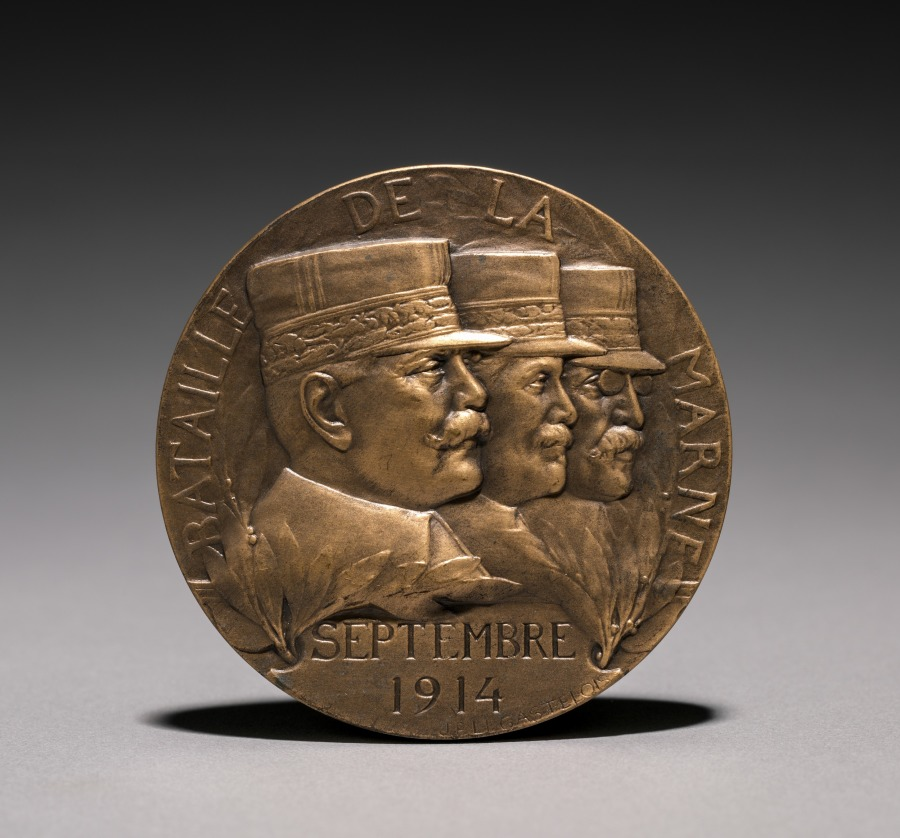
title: Medal (obverse)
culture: France, 20th century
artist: Jules Prosper Legastelois (French, 1855–1931)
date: 1914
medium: bronze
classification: Metalwork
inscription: Bataille de la Marne September, 1914.